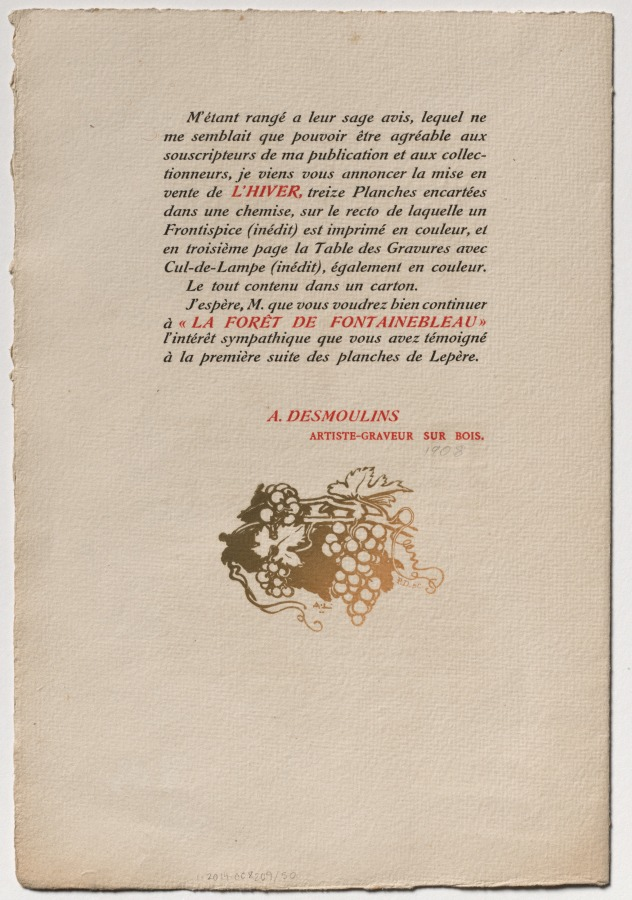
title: Fontainebleau Forest: Ad for "Fontainebleau Forest" (La Forêt de Fontainebleau)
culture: France, 19th century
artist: Auguste Louis Lepère (French, 1849–1918)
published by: A. Desmoulins, Published in Revue Illustrée, 1887–90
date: 1890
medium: pamphlet, color woodcut on cover, related to bound volume with 34 wood engravings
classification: Bound Volume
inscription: In block within image, in green ink, printing in letterpress: A. LEPÉRE; in plate, within image, in black ink: LA FORÊT DE FONTAINEBLEAU / Gravures originals de A. Lepère; in plate, within image, in red ink: Chez A. DESMOULINS, GRAVEUR / BOULEVARD JOURDAN - 60 -- / PARIS; below image, in green ink: P.D. SC.